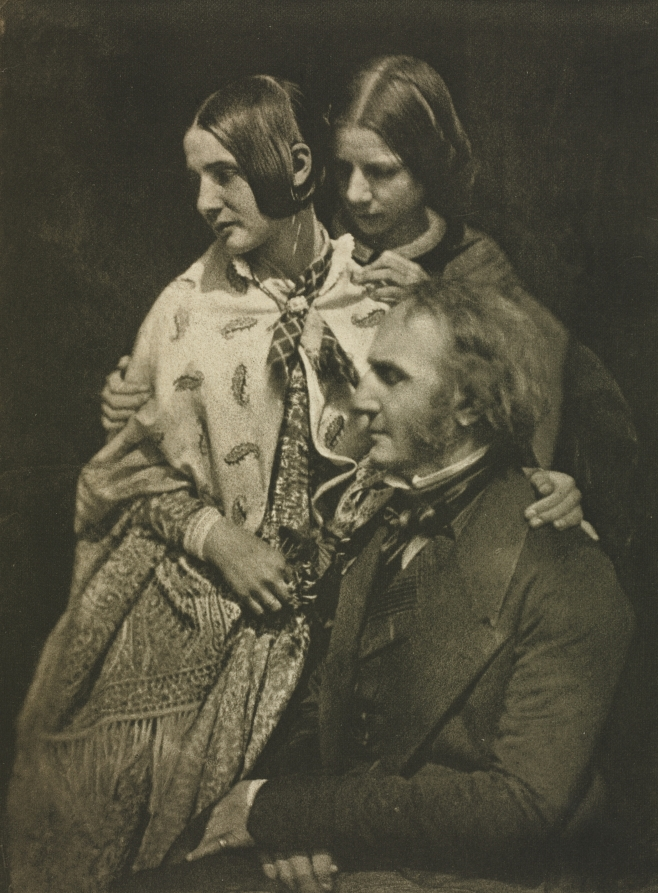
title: Camera Work: Portraits - A Group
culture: England, 20th century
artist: David Octavius Hill (British, 1802–1870)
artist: and Robert Adamson (British, 1821–1848)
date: 1909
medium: photogravure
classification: Bound Volume